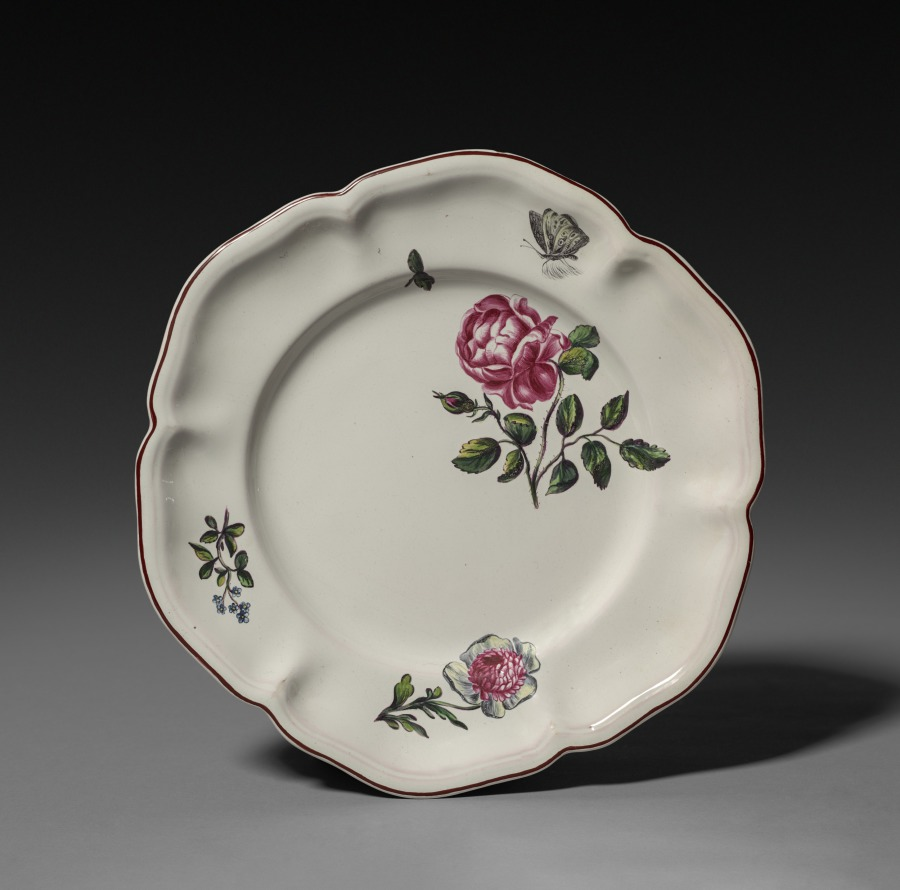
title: Large Plate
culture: France, Strasbourg, 18th century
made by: Strasbourg Factory (France)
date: c. 1762–1779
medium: faience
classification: Ceramic